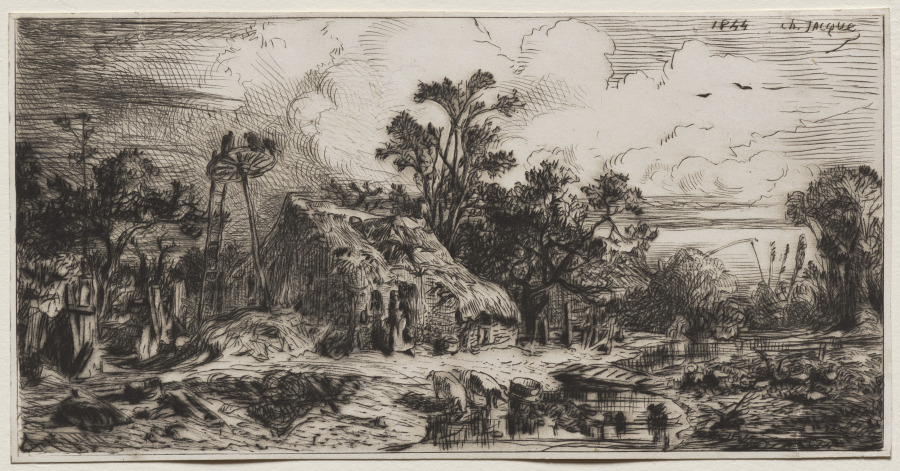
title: The Cottage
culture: France, 19th century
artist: Charles-Émile Jacque (French, 1813–1894)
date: 1844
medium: drypoint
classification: Print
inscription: upper right, in plate: "1844 Ch. Jacques"